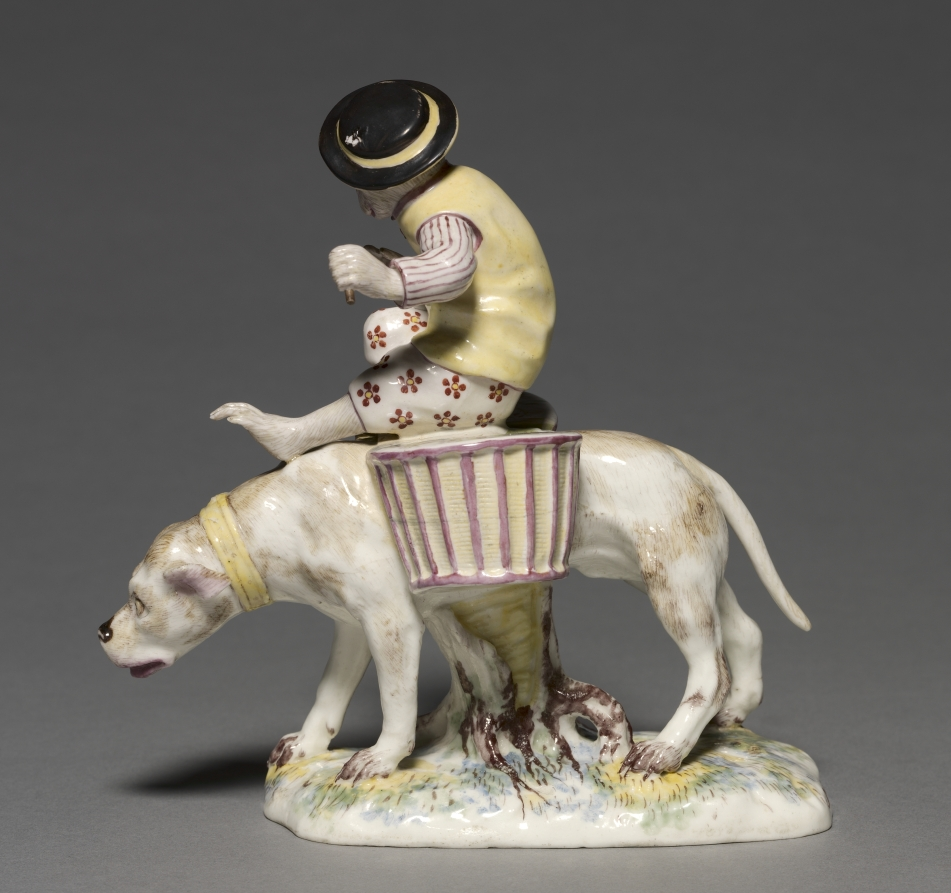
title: Figure of a Monkey on a Dog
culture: France, Mennecy, 18th century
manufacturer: Villeroy Factory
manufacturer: Mennecy- Villeroy Factory (French)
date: c. 1745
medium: soft-paste porcelain with enamel decoration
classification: Ceramic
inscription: [Incised on back of base, filled with manganese (brown)]: D.V.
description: Images of this type, monkeys dressed in human clothing and engaged in human pursuits, were called singeries and were represented in 18th-century French painting and decorative art. This particular figurine was based on a book of engravings that provided designs for contemporary craftsmen and was published by animal painter Christopher Huet in 1748.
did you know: This monkey may have once held a stick in its outstretched left hand.